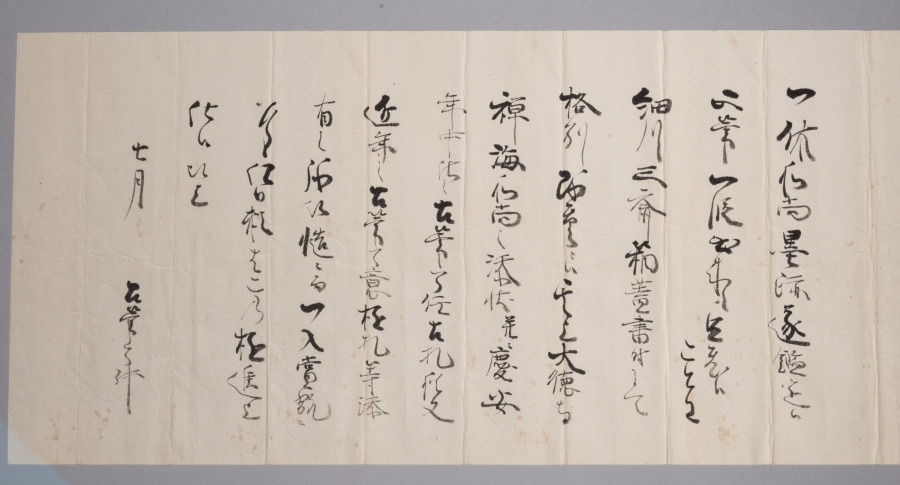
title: Calligraphy with Willow and Swallows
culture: Japan, Muromachi period (1392–1573)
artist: Ikkyū Sōjun (Japanese, 1394–1481)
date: 1400s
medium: hanging scroll, ink on paper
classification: Painting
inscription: How many days has it rid itself of the crow’s cloth? It knows not!/ Lovely is its body so nimble and neat./ Neither men of wealth, courtly position, or power can come close to the unfettered, noble swallow!/ With the coming of spring, it seems to be flying about, dancing around the grass hut of the foolish Priest. signed: Unkasō Isshi Tōkai jun Ikkyū shi ga ippitsu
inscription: outer box inscribed: Ikkyū Ōshō Enshi-zu Jigasan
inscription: inner box side lid inscribed: Showa 50 (1975), November by Tayama Honan with kao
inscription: Inner box side lid inscribed: Ikkyū Ōshō Bokuseki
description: The famed Buddhist monk Ikkyū is best remembered for his calligraphy. Calligraphic conventions of his time called for brushwork that did not vary much in style from character to character. However, as Ikkyū’s lines progress, his brushwork wanders between standard script and a sort of shorthand, marked by an uneven distribution of ink and a reduction of the characters to only the most necessary strokes. Ikkyū’s direct communication of emotion via brushwork became characteristic of the works produced by monks affiliated with the temple Daitokuji later in the Edo period (1615–1868).